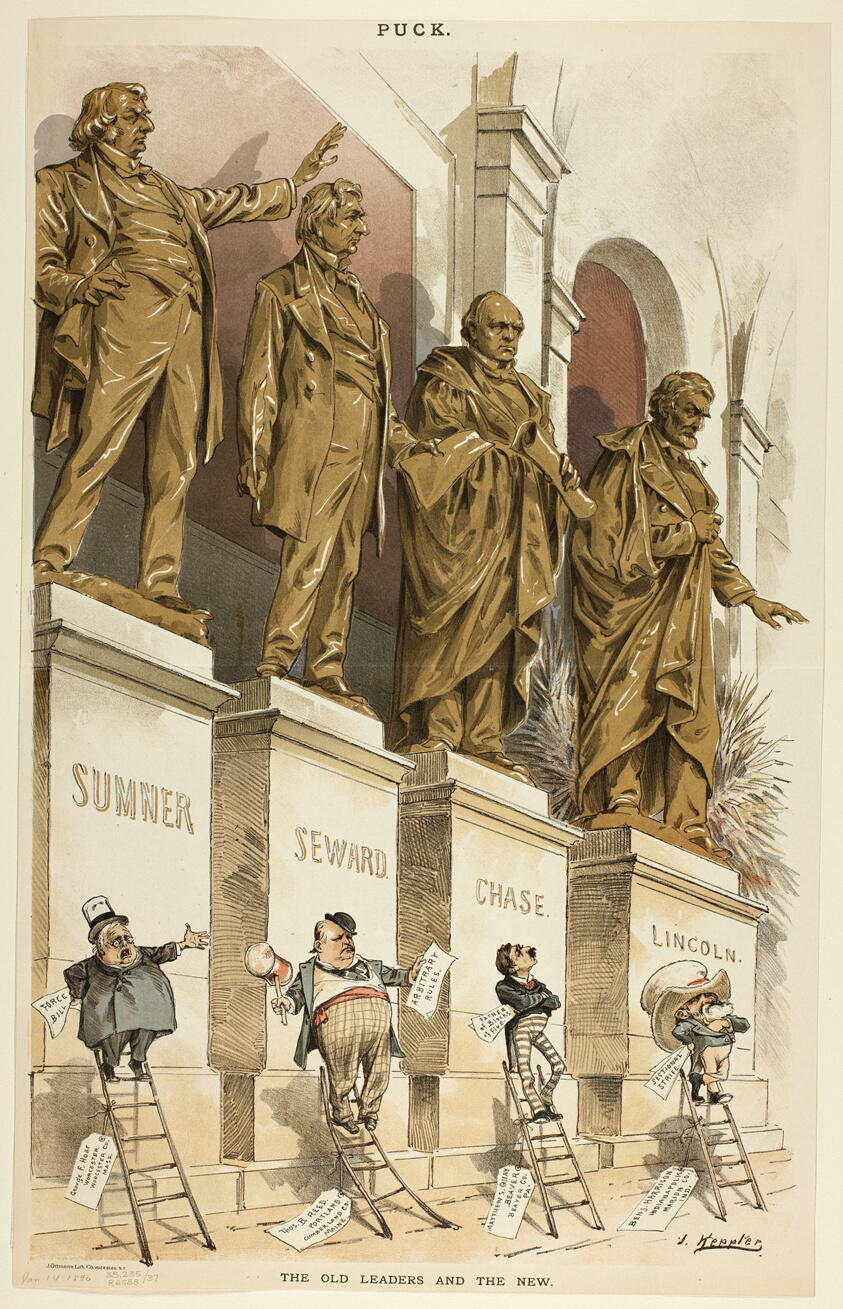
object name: Print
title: The Old Leaders and the New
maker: Joseph Keppler (American, 1838-1894)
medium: Color lithograph on newsprint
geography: United States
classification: lithograph; print; prints and drawing